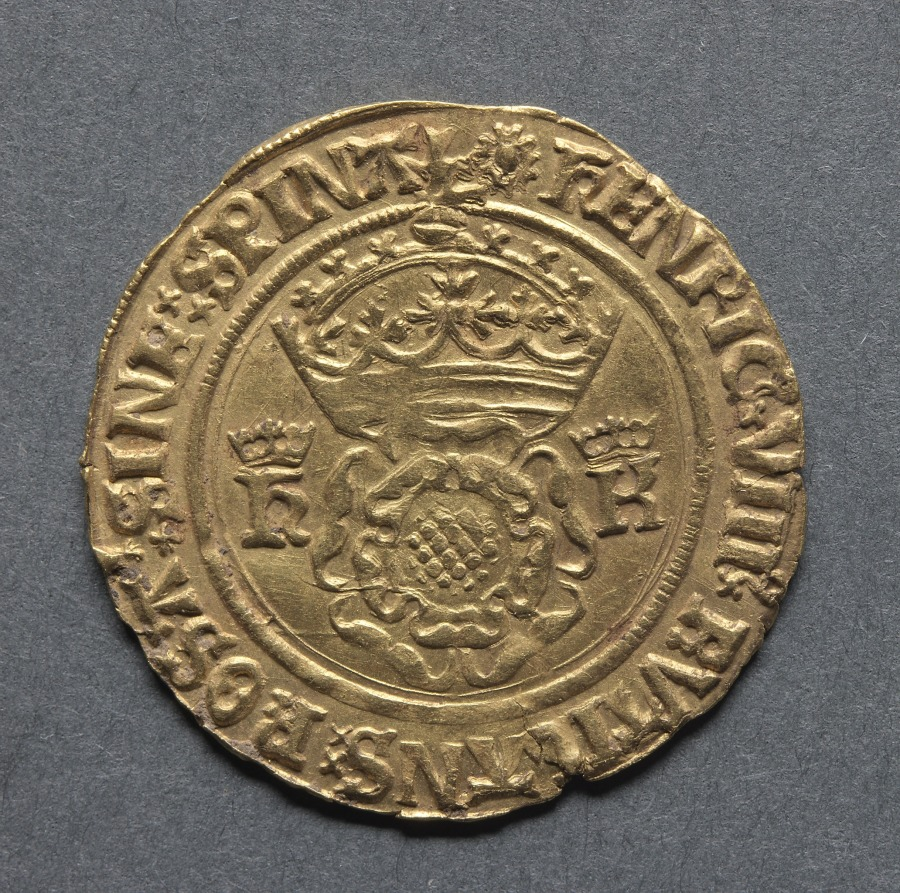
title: Crown of the Double Rose: Crowned Double Rose (obverse); Crowned Royal Arms (reverse)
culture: England, Henry VIII, 1509-1547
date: 1526–33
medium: gold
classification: Coins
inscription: HENRIC VIII RUTILANS ROSA SINE SPINE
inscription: DEI GR ANGLIE Z FRANC DNS HIBERNIE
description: For the first time the Crown of the Double Rose makes it appearance. On these coins the motto Rutilans Rosa Sine Spine, a dazzling rose without a thorn, follows the king's name on the obverse. The crowned initials on either side of the rose are those of Henry and his first queen, Katherine (or Catherine) of Aragon. Since Henry divorced Katherine in 1533, the date of this piece must fall between 1526 and 1533. It was this divorce which helped to bring about the fall of the famous Cardinal Wolsey, the beheadings of Sir Thomas More and Bishop Fisher, and the separation of the English Church from that of Rome.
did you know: Henry VIII placed the initials of three of his queens on some of his coins, the only occasion on which this has been done on the English coinage.